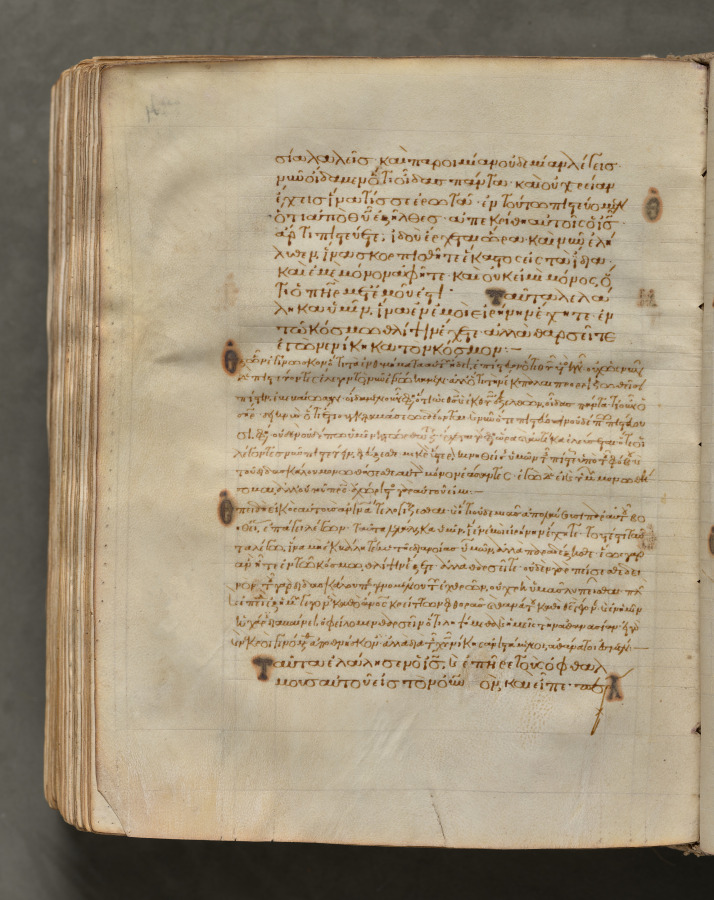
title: Text, folio 402 (verso), from a Gospel Book with Commentaries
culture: Byzantium, Constantinople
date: c. 1000–1100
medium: ink, tempera, and gold on vellum; leather binding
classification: Bound Volume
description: Each of the four gospels in this book opens on a page with brilliantly illuminated borders depicting the author of the text as well as birds—principally peacocks, symbols of the immortality of the soul—and fountains, representing the fountain of life and the salvation of the soul. This volume consists of 428 leaves with texts in Greek. Its level of sophistication suggests that it was probably written and decorated in a monastery in Constantinople.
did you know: Gospel books were carried in procession through Byzantine churches.